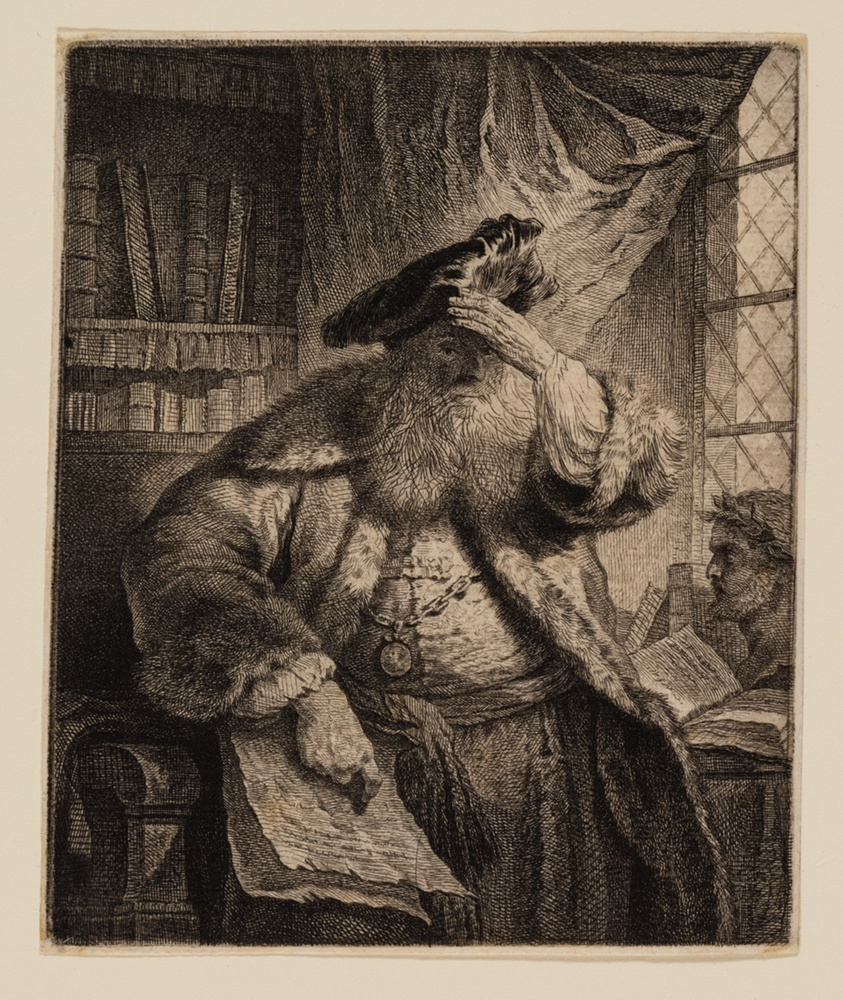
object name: Print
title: Old Man Shading His Eyes with His Hand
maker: Rembrandt van Rijn (Dutch, 1606-1669)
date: c. 1639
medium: Etching on off-white laid paper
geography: Holland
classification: etching; print; prints and drawing; paper